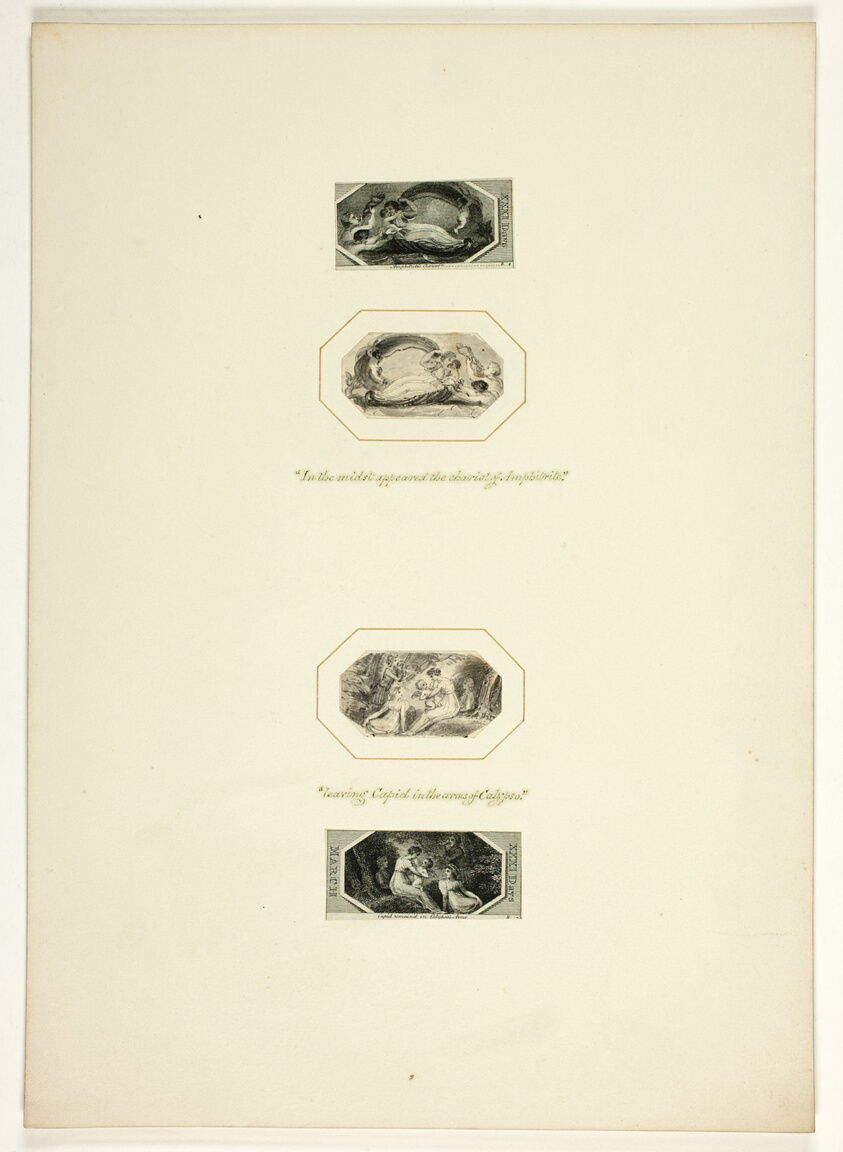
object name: Drawing and Watercolor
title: Study for a plate from Telemachus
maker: Thomas Stothard (English, 1755-1834)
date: c. 1797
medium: Ink wash on paper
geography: England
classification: ink or chalk wash; drawings (visual works); prints and drawing